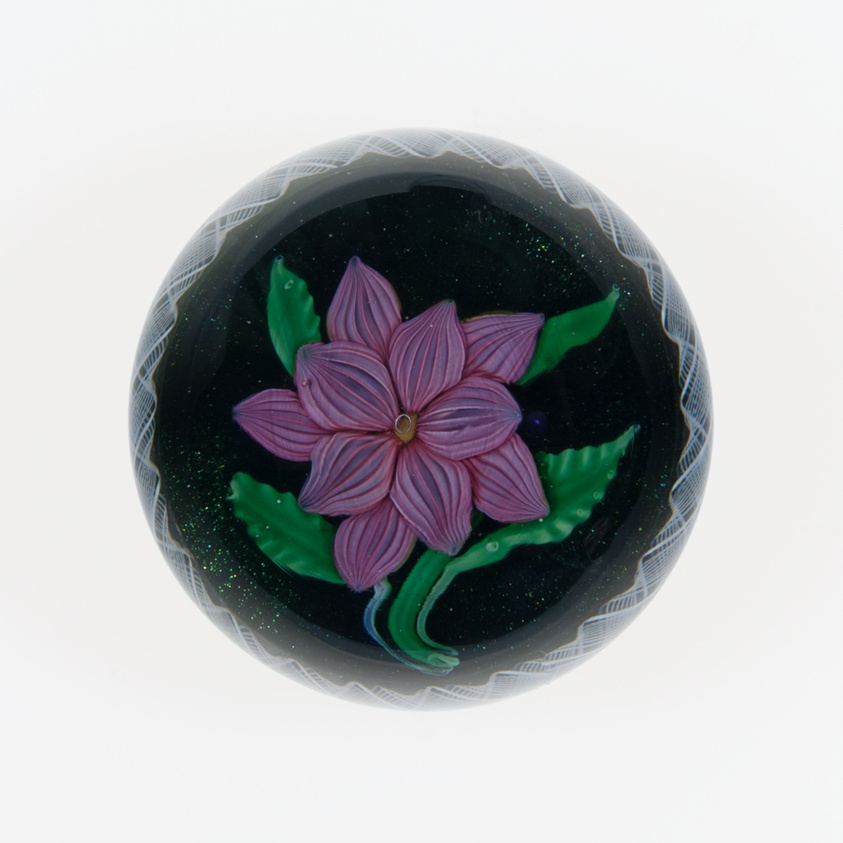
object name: Glass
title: Paperweight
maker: Saint-Louis Glassworks (Cristalleries de Saint-Louis); Lorraine, France, founded 1586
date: c. 1848–55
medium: Glass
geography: Saint-Louis-lès-Bitche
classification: paperweight; lampwork; european decorative arts; glass